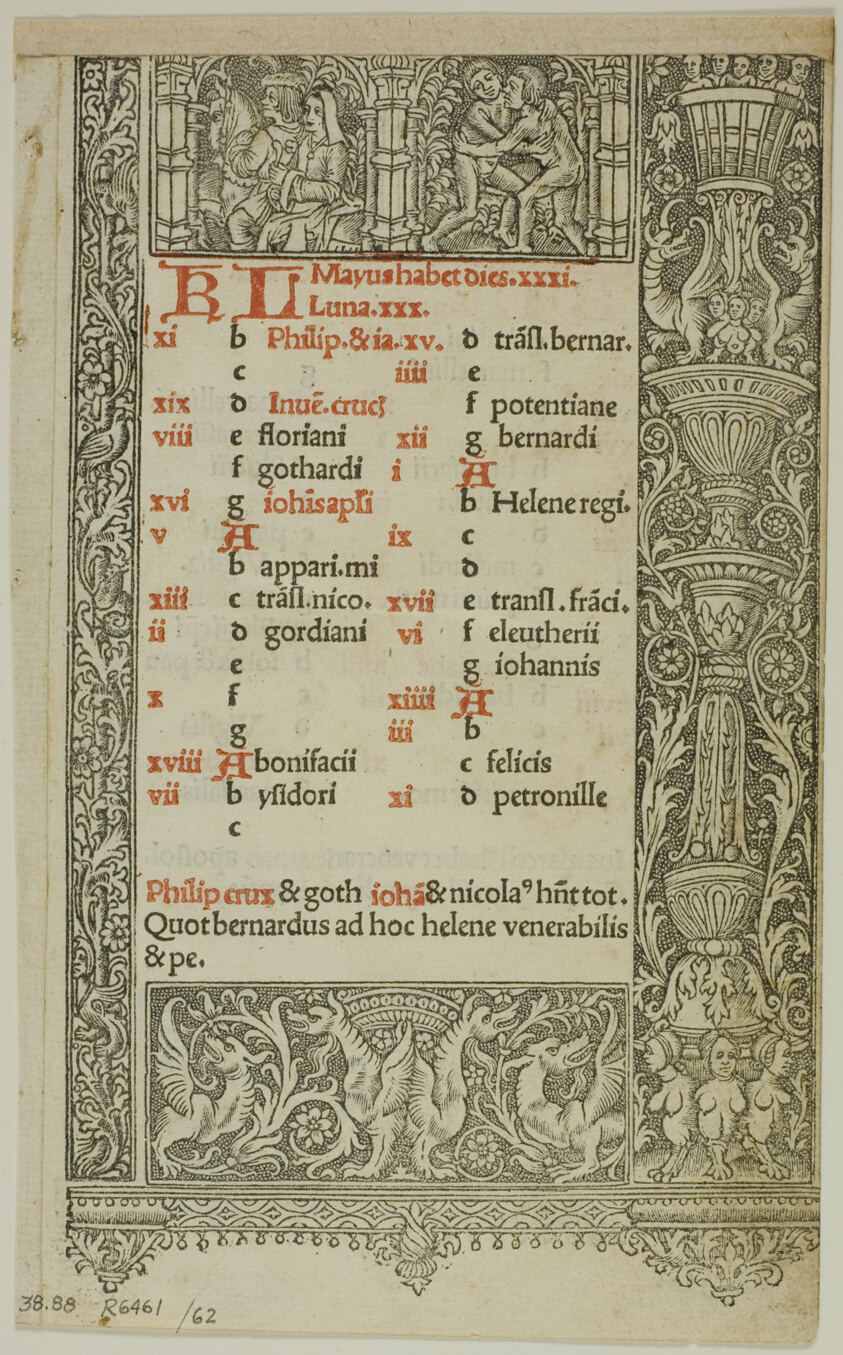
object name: Print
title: Illustration from Officium B.M.V., plate 62 from Woodcuts from Books of the XVI Century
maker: Unknown Artist (French, 16th century); assembled by Max Geisberg (Swiss, 1875-1943)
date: 1505, assembled into portfolio 1937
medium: Metalcut on paper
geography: France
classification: woodcut; print; prints and drawing